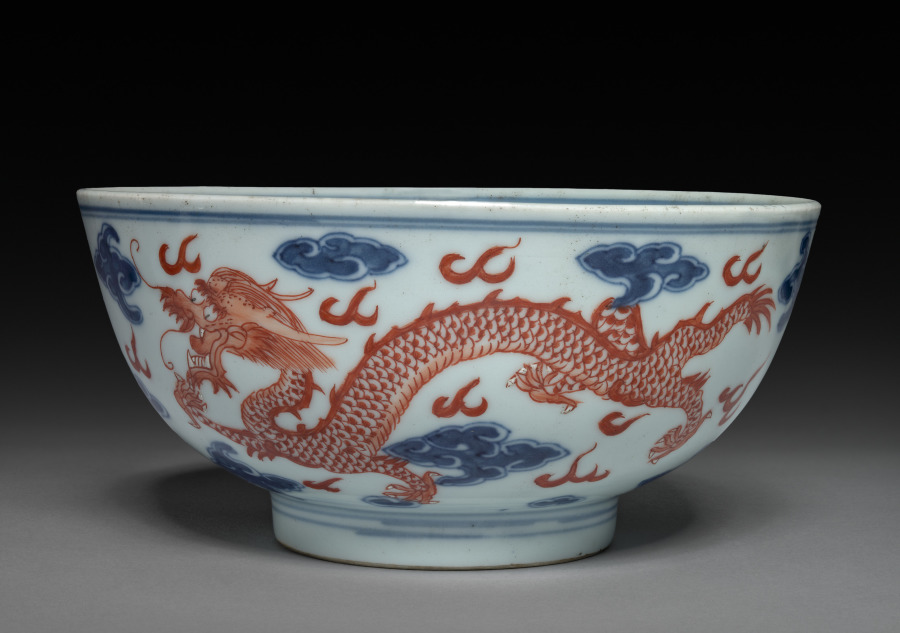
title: Bowl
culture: China, Qing dynasty (1644-1911), Qianlong mark and reign (1736-95)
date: 1736–95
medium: porcelain with overglaze red and underglaze blue enamel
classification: Ceramic